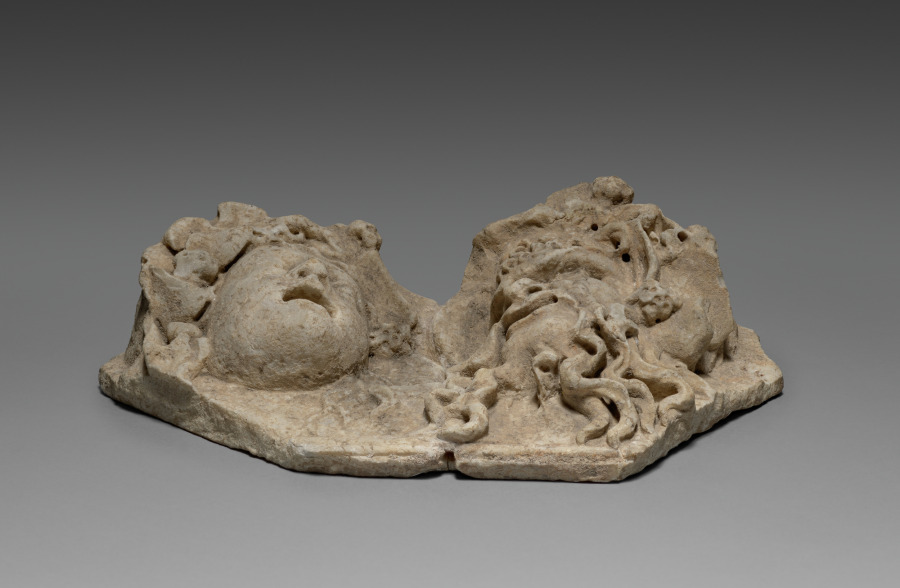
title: Two Masks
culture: Italy, Roman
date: 200s CE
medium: marble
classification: Sculpture